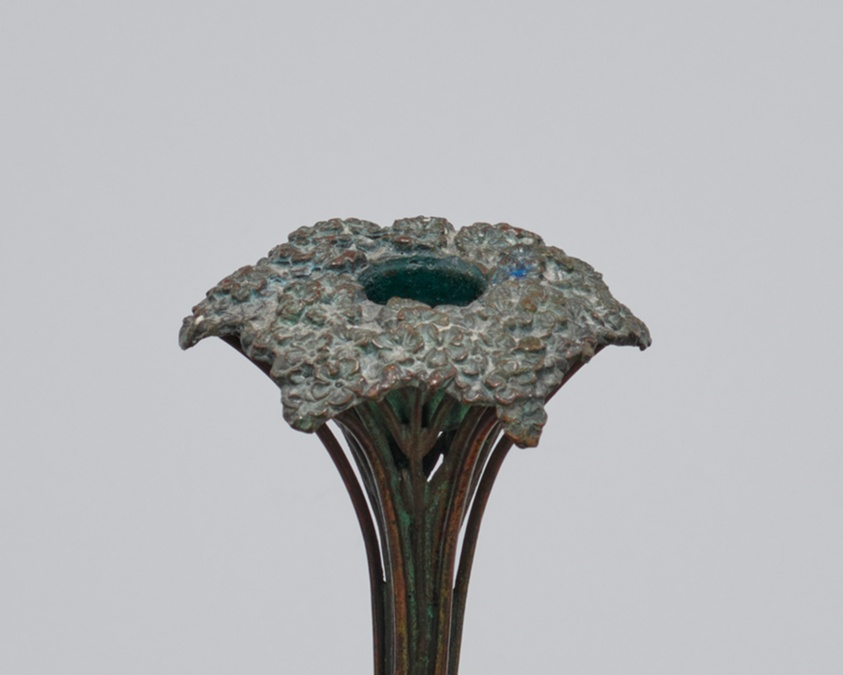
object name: Metalwork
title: “Saxifrage” Candlestick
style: Arts and Crafts Movement, 20th Century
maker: Tiffany Studios (American, 1902–32); Corona, New York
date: c. 1905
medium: Bronze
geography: Corona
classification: candleholder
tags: saxifrage, flowers